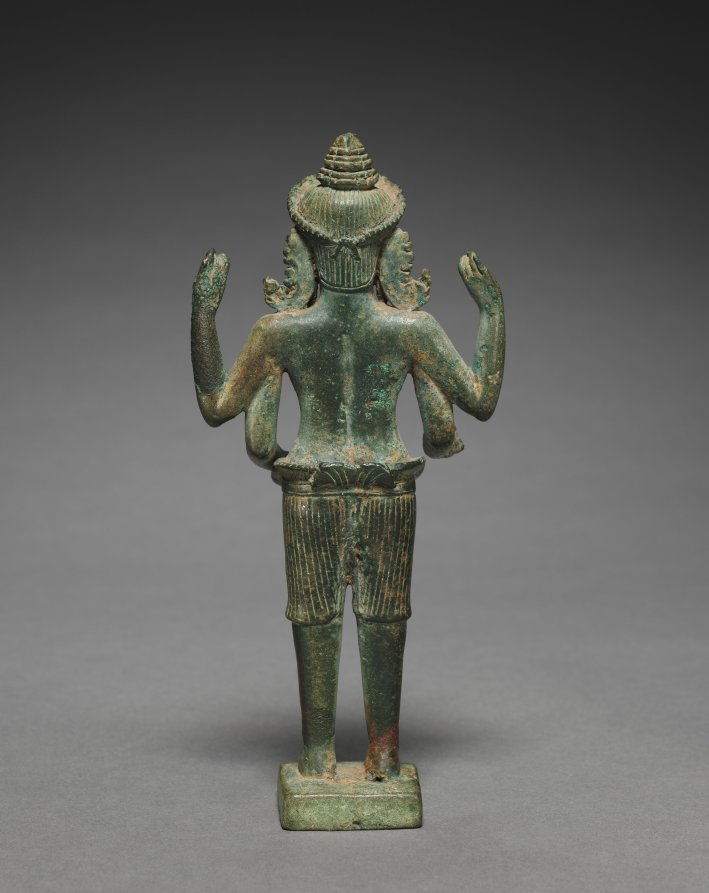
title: Standing Ashura with Four Arms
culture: Cambodia, Koh Ker style, 2nd quarter of 10th Century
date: 925–950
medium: bronze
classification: Sculpture